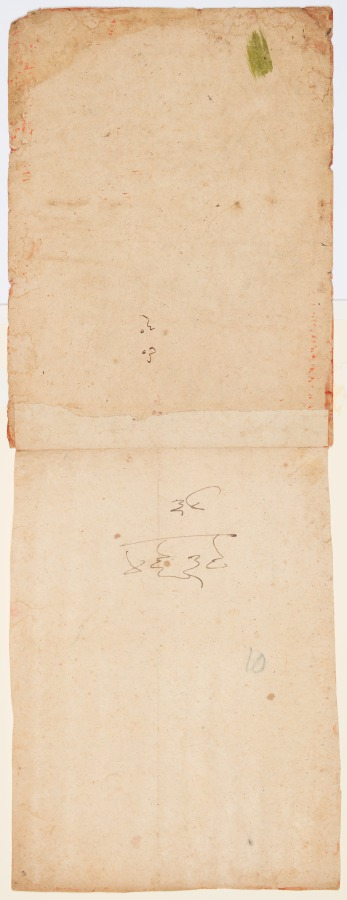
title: Adoration of young Krishna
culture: Northern India, Pahari kingdoms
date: c. 1720–25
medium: gum tempera on paper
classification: Painting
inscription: Number ‘30’ on the verso, Takri Number ‘34/4638’ on the leaflet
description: The painting shows Krishna being worshipped under a pipal tree by a group of Shaivite devotees, recognized by the horizontal marks on their foreheads. Krishna is clad in a yellow Mughal jama, or belted Central Asian tunic, instead of the wrapped Indian lower garment (dhoti) traditionally associated with Krishna. The tree has been decorated with garlands and scarves to attract auspicious and divine benevolence.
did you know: Krishna is holding a rattle in his right hand.